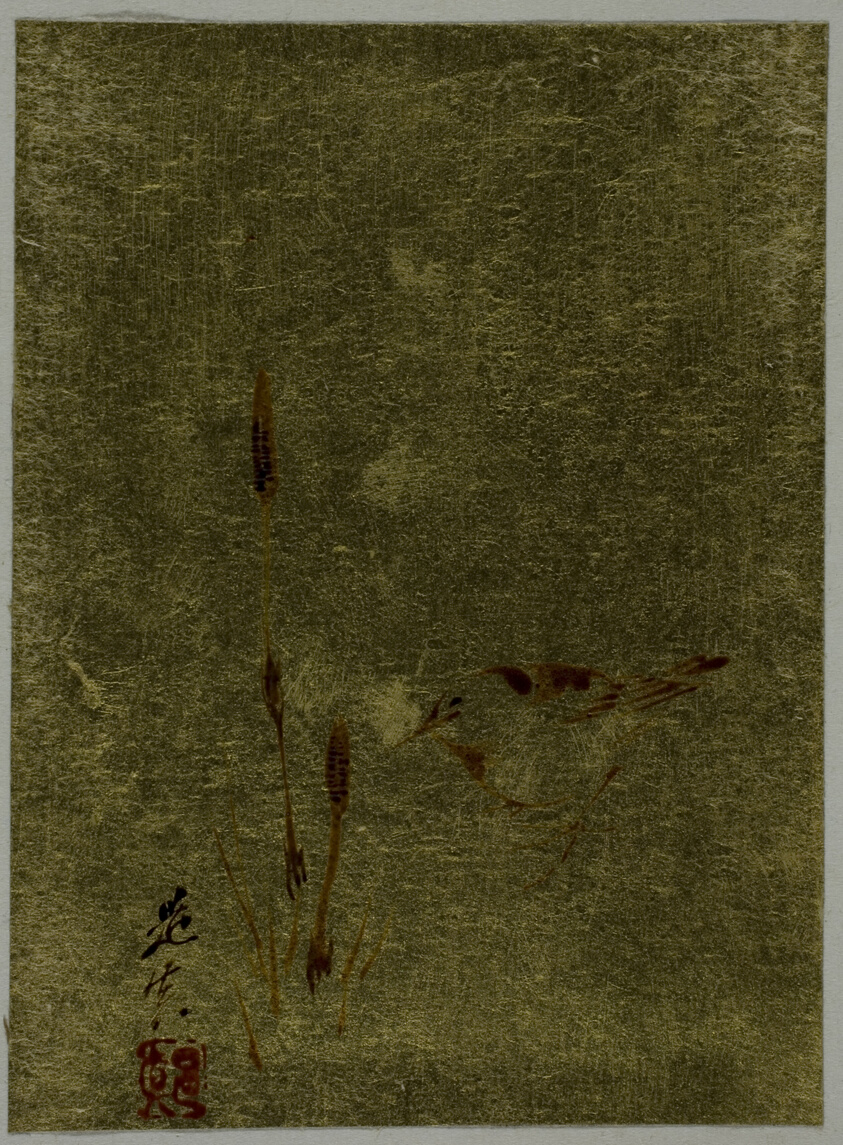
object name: Painting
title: Bird and Cattails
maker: Shibata Zeshin (Japanese, 1807-1891)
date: Meiji period (1868–1912)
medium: Album leaf, inks and color on paper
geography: Japan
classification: album leaf; album/sketchbook; asian art; painting